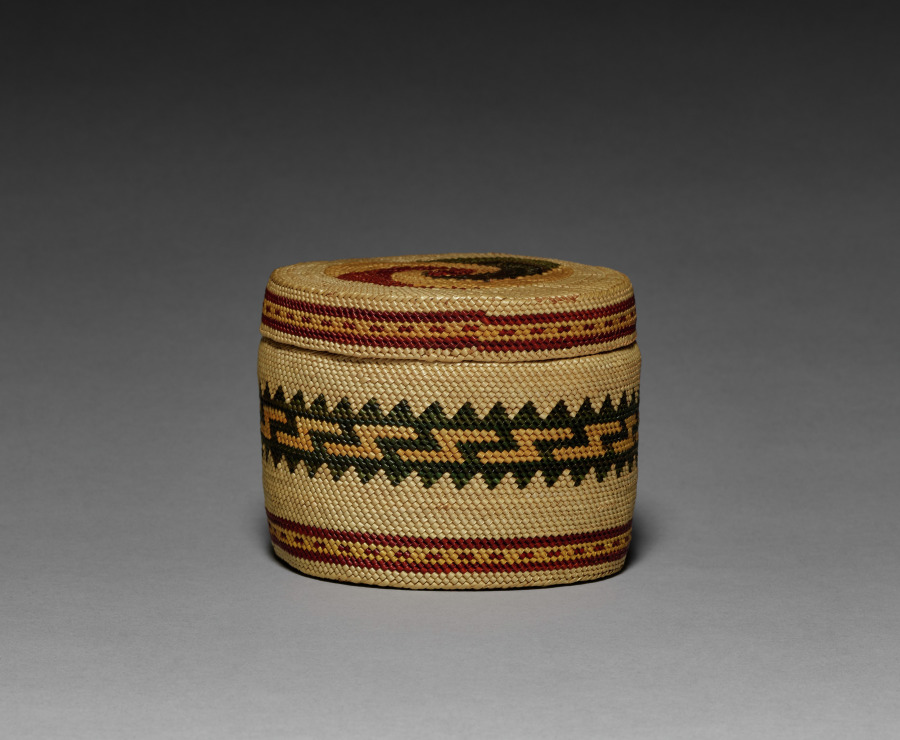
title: Covered Bowl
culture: Northwest Coast, Makah, late 19th-early 20th century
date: c. 1875–1925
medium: twined grasses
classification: Basketry